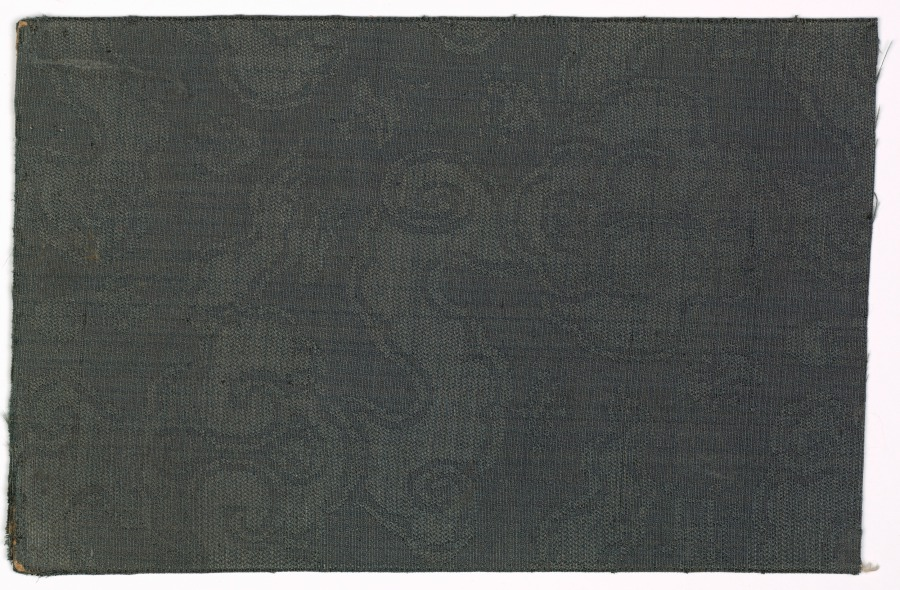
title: Book Cover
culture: China, 19th century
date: 1800s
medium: silk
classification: Textile